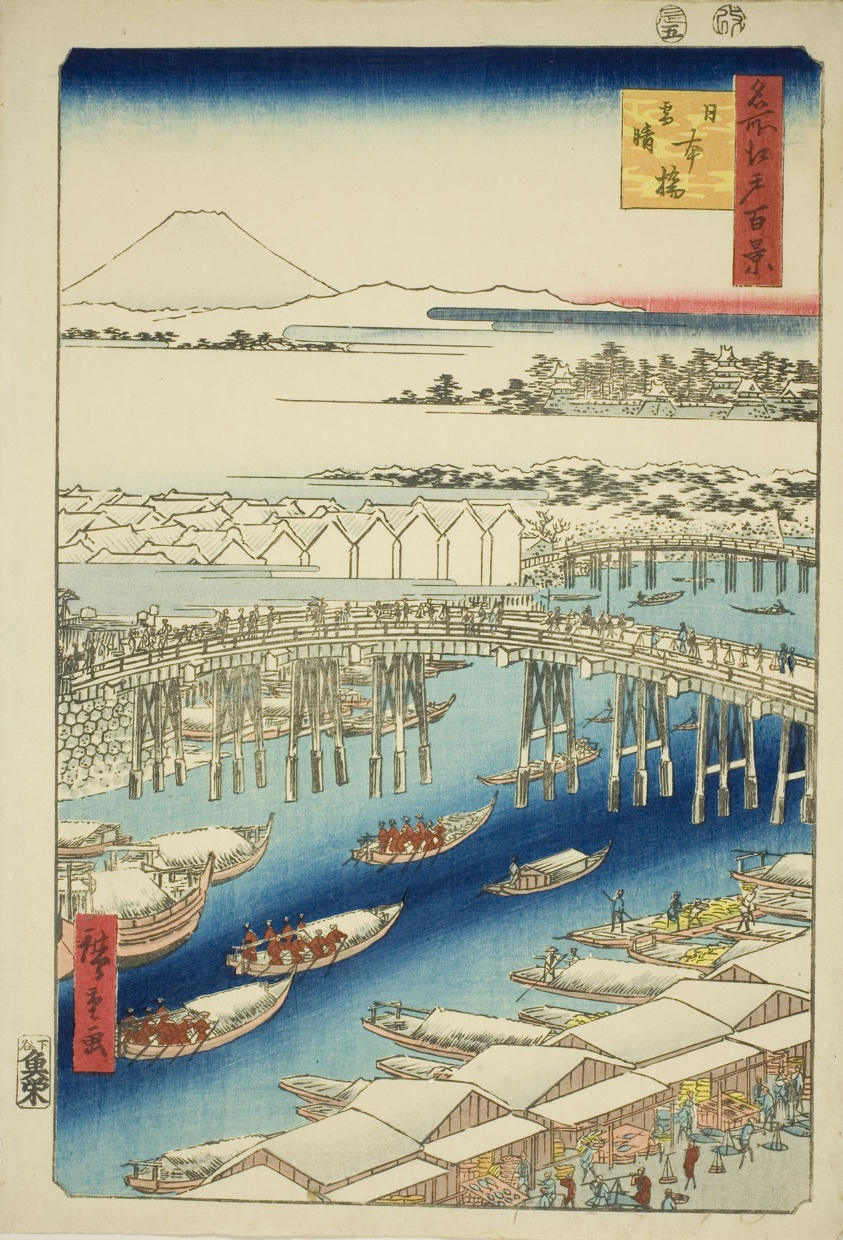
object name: Print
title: Clear Weather After Snow at Nihon Bridge (Nihonbashi yukibare), from the series "One Hundred Famous Views of Edo (Meisho Edo hyakkei)"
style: Japanese (culture or style)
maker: Utagawa Hiroshige 歌川 広重; Japanese, 1797-1858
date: 1856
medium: Color woodblock print; oban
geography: Japan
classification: woodblock print; print; asian art